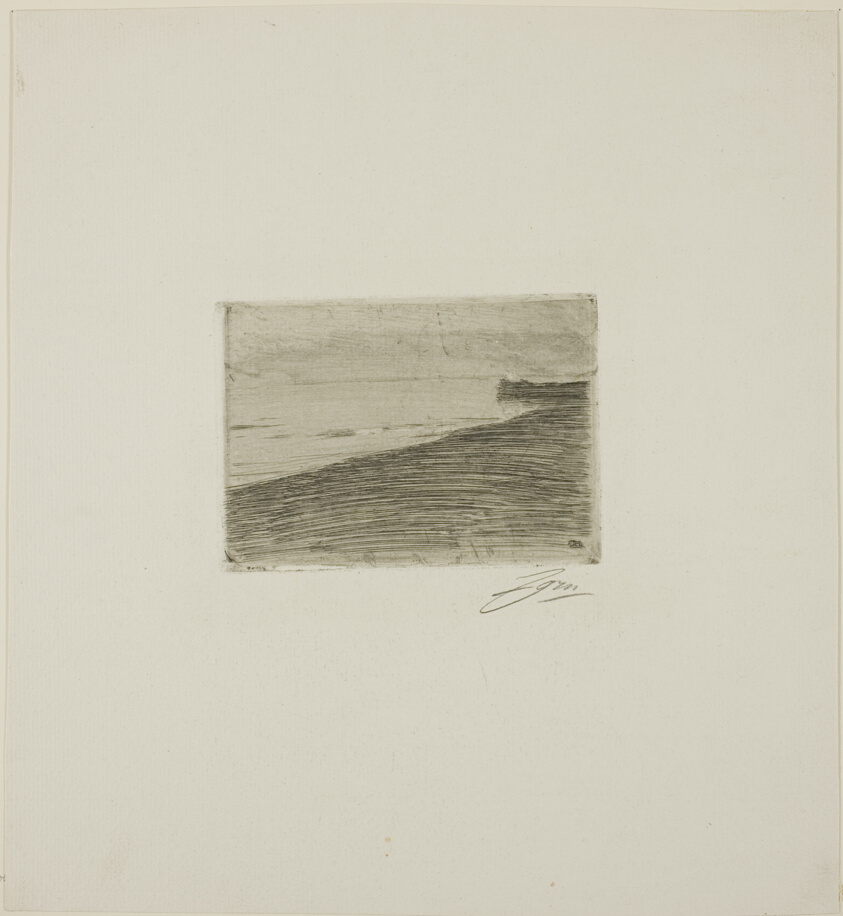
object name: Print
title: At Folkstone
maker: Anders Zorn (Swedish, 1860-1920)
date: 1890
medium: Etching on ivory laid paper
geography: Sweden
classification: etching; print; prints and drawing